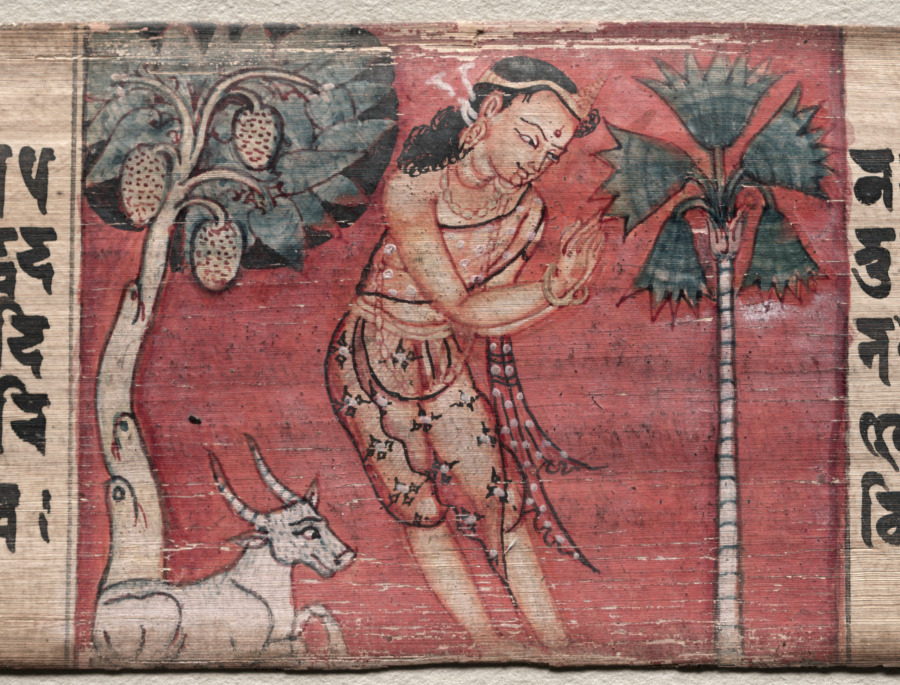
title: Sudhana and a buffalo, folio 115 (recto) from a Gandavyuha-sutra (Scripture of the Supreme Array)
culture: Nepal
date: 1000–1100s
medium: gum tempera and ink on palm leaf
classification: Painting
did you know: The palm leaves used to create manuscripts were harvested from the Talipot Palm, seen on the right.